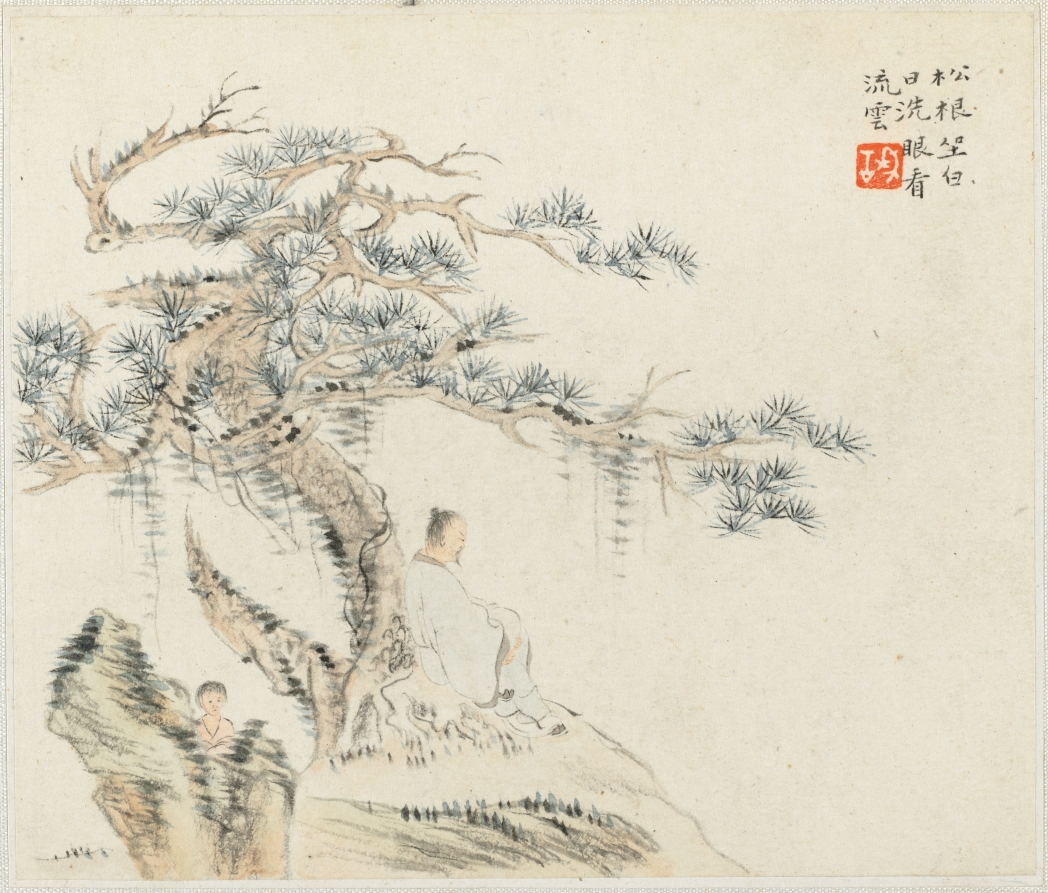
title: Album of Landscape Paintings Illustrating Old Poems: Scholar under a Pine Tree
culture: China, Qing dynasty (1644–1911)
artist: Hua Yan (Chinese, 1682–c. 1765)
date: 1745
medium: album leaf, ink and light color on paper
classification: Painting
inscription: In the daytime, I sit on the root of a pine tree, I wash my eyes to watch the floating clouds." not signed, with a seal of the artist.